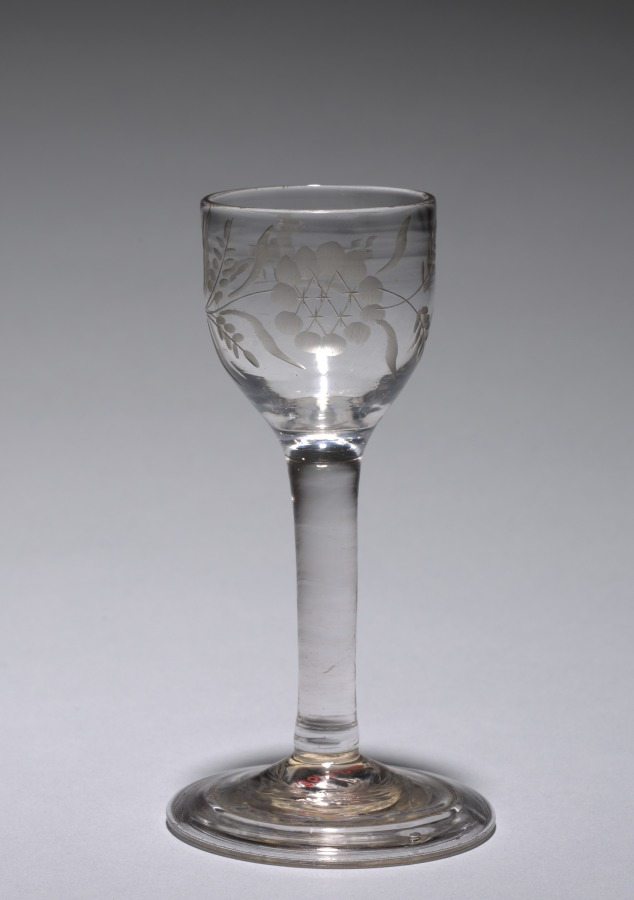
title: Wine Glass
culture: England, 18th century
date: 1750–1799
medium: glass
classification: Glass